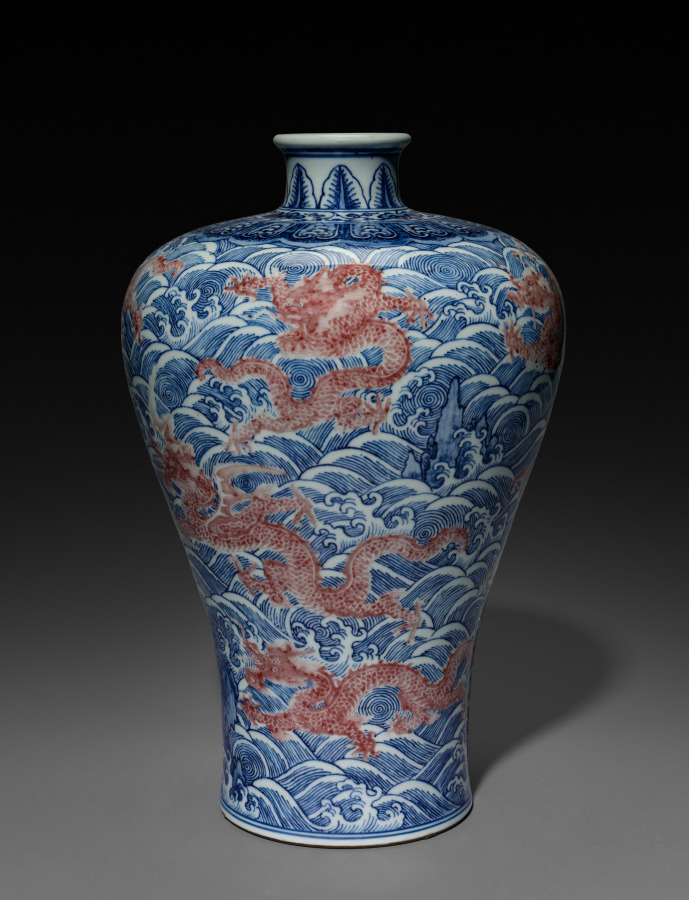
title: Bottle Vase with Dragons and Waves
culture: China, Jiangxi province, Jingdezhen kilns, Qing dynasty (1644-1911), Qianlong mark and reign (1736-95)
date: 1736–95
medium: Porcelain decorated in underglaze cobalt blue and copper red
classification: Ceramic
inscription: 大清乾隆年制